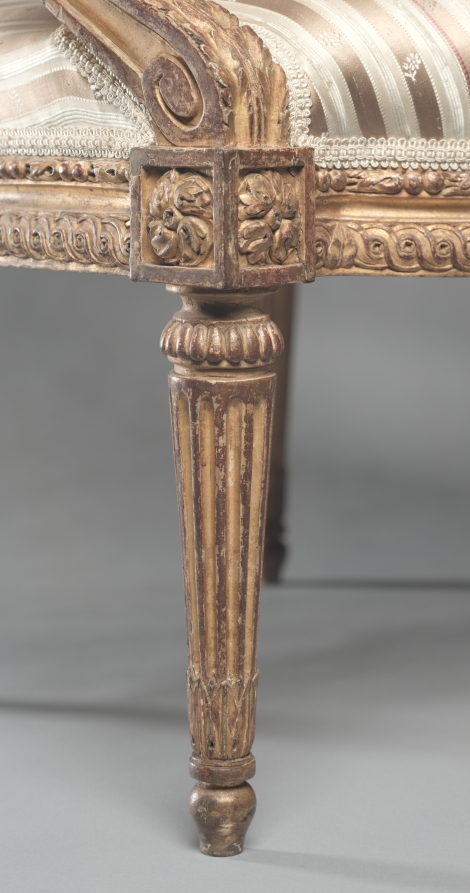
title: Armchair (Fauteuil) (1 of 2)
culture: France, 18th century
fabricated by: Jean-Baptiste II Tilliard (French, 1797)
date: c. 1765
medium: carved and gilded wood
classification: Furniture and woodwork